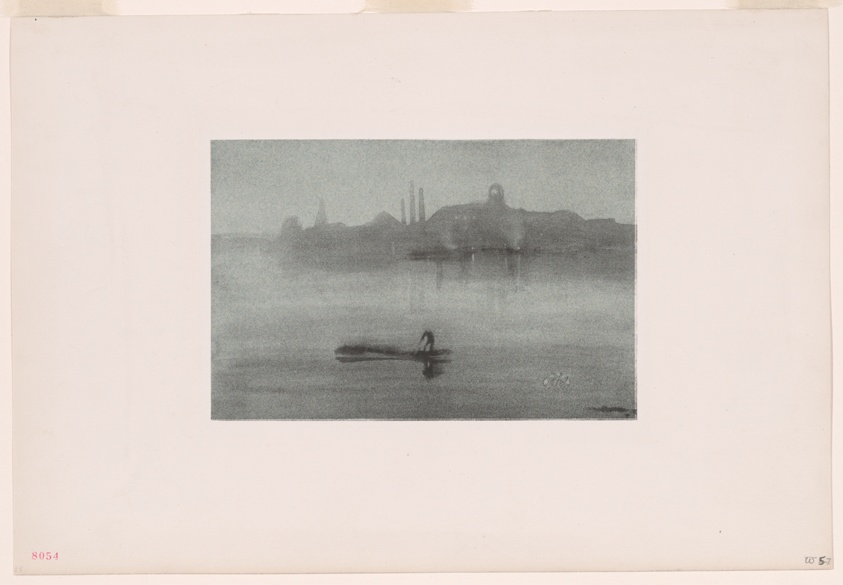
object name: Print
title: Nocturne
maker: James McNeill Whistler (American, 1834-1903)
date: 1878, published 1887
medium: Lithotint, on a prepared half-tint ground, in black with scraping, on blue laid paper, laid down on ivory plate paper (chine collé)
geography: United States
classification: lithotint; lithograph; print; prints and drawing; paper